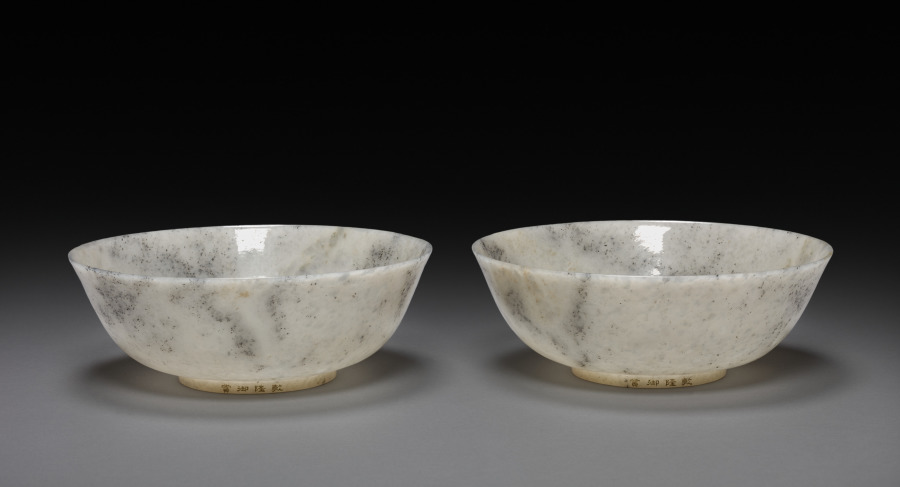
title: Pair of Bowls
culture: China, Qing dynasty (1644-1911), Qianlong mark and reign (1736-95)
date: 1736–95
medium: jade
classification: Jade